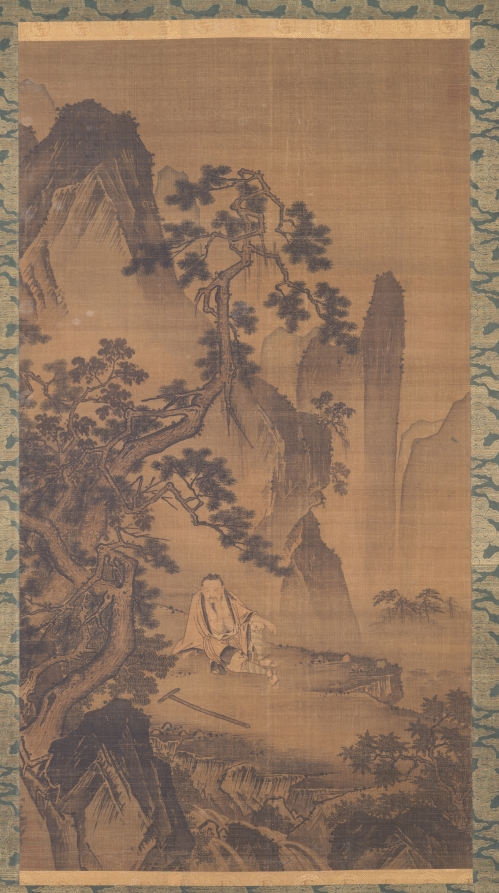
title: The Hermit Xu You Resting by a Stream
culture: China, Ming dynasty (1368–1644)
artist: Dai Jin (Chinese, 1388–1462)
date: 1400s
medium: Hanging scroll; ink and slight color on silk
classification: Painting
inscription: 5 seals: 1 of Huang Lin 黄琳 (active about 1496–1532); 4 unidentified.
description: Xu You, a recluse who refused the throne offered to him by legendary Emperor Yao, chose instead to farm on Mount Ji. Sitting under cliffs, his left arm resting on his risen leg and his loose robe revealing his belly, he displays a nonchalant attitude. Xu You is wearing a laborer’s outfit, a short robe and tight leggings, while his composed pose and gentle features reveal his lofty character. The composition shows rising mountains on the left juxtaposed by open space on the far right. Powerful brushstrokes and nuanced ink washes follow the style of the Southern Song (1127–1279) academy painters.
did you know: When the emperor offered him a post overseeing the Nine Territories (as China was known in ancient times), Xu You went to the River Ying to cleanse his ears from such an unwelcome proposition.